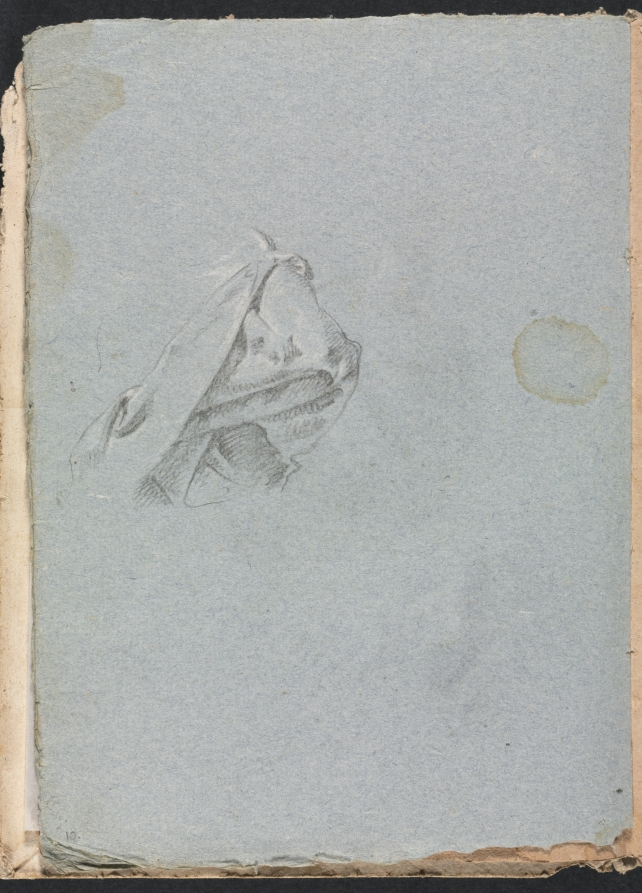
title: Verona Sketchbook: Drapery study (page 10)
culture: Italy, 18th century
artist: Francesco Lorenzi (Italian, 1723–1787)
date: 1760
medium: black chalk with white heightening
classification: Bound Volume